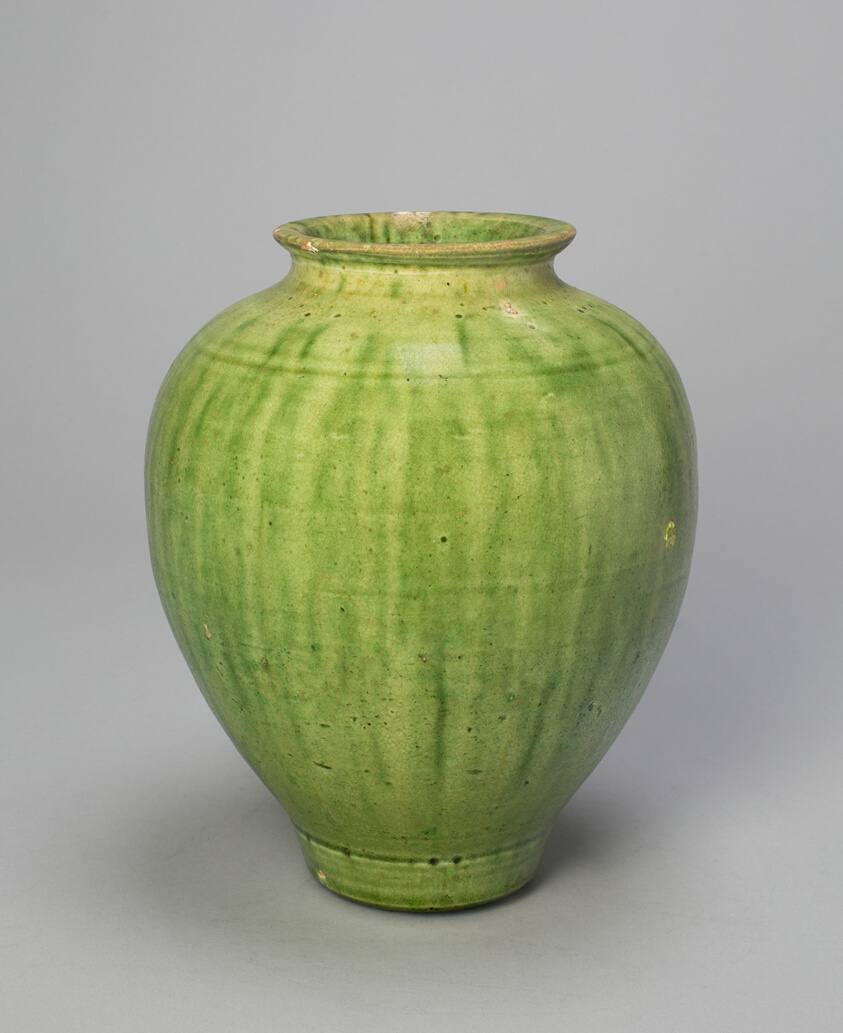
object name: Vessel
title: Jar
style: Chinese (culture or style)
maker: China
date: Tang dynasty (618–906)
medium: Earthenware with green glaze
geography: China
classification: earthenware; asian art; ceramics; vessel